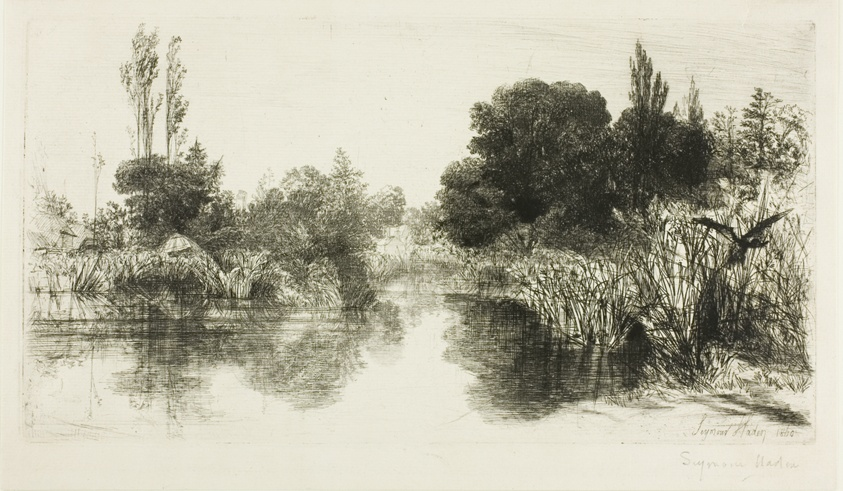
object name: Print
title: Shere Mill Pond, No. II (large plate)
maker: Francis Seymour Haden (English, 1818-1910)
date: c. 1860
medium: Etching with drypoint on cream laid paper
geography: England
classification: etching; print; prints and drawing